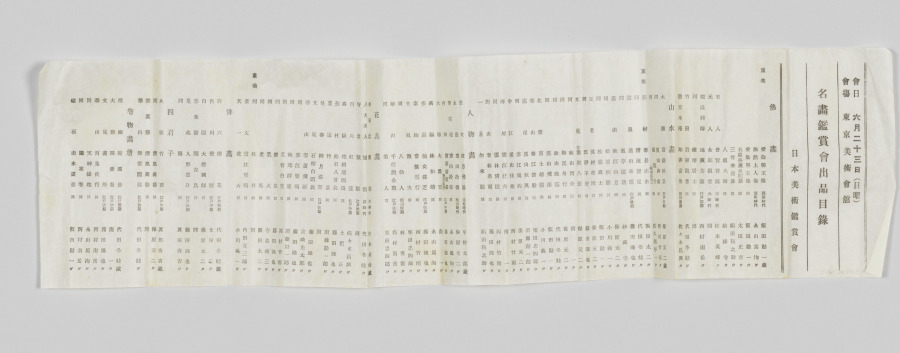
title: Evening Snow Blending River and Sky, from Eight Views of Xiao-Xiang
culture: Japan, Edo period (1615–1868)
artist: Tani Bunchō (Japanese, 1763–1841)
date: 1788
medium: album leaf remounted as a hanging scroll; ink and color on paper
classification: Painting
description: This painting was part of a set of album leaves representing the Eight Views of Xiao-Xiang, a theme originating in Chinese poetry and painting that spread to both Korea and Japan. Southern China’s Xiao-Xiang area, where the mist-covered banks of the Xiang River created a complex landscape shifting like the moods and minds of people, captured the imaginations of generations of painters and calligraphers. Inscriptions on these works suggest that they were possibly ordered by newly prominent Japanese Confucian scholars.